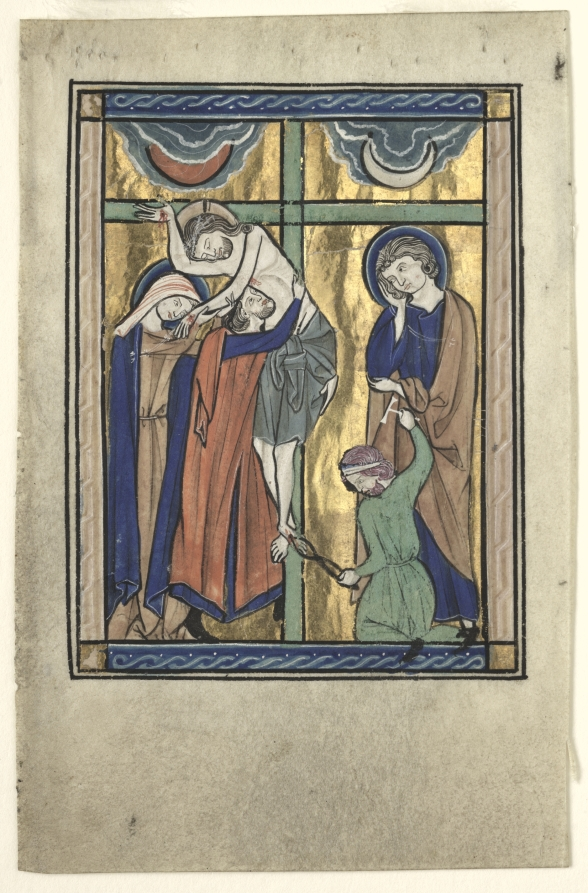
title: Miniature Excised from the "Potocki Psalter": The Deposition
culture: France, Paris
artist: Master of the Potocki Workshop (French, Paris)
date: c. 1240–1250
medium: tempera, and gold on vellum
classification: Manuscript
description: This detached leaf derives from a Parisian luxury psalter. Psalters were books containing the 150 biblical psalms and commonly used for private devotion. It provides a superb example of Parisian Gothic painting at its most refined stage, with strong emphasis on line and color. It illustrates the new court style of King Louis IX (1214–1270) in which tall figures assume sinuous postures and the drapery forms large broken folds around the body. The high quality of the painting suggests the original psalter was destined for an aristocratic patron. The manuscript to which this miniature once belonged, the Potocki Psalter, is named after its last private owner, the Polish count Stanislaus Potocki (1755–1821). It is today preserved in the National Library of Warsaw in Poland.